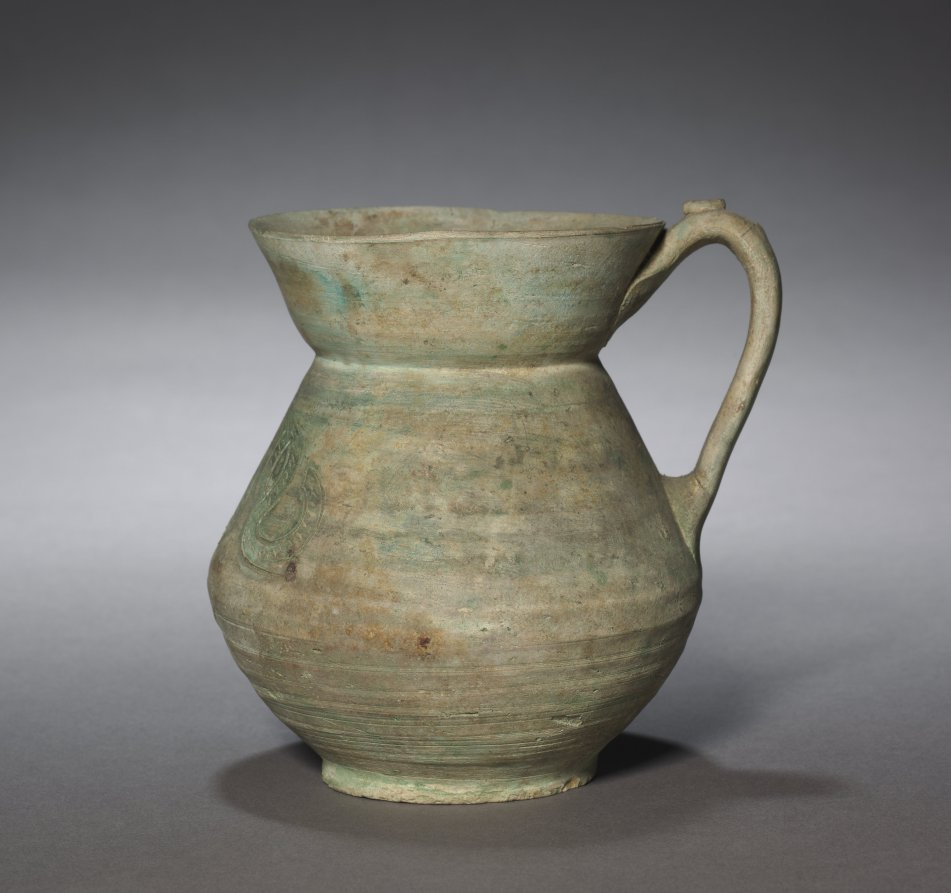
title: Jug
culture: Iran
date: 900s–1100s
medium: earthenware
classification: Ceramic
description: This jug was acquired in 1915, prior to the museum opening.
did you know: The handle has a thumb rest.